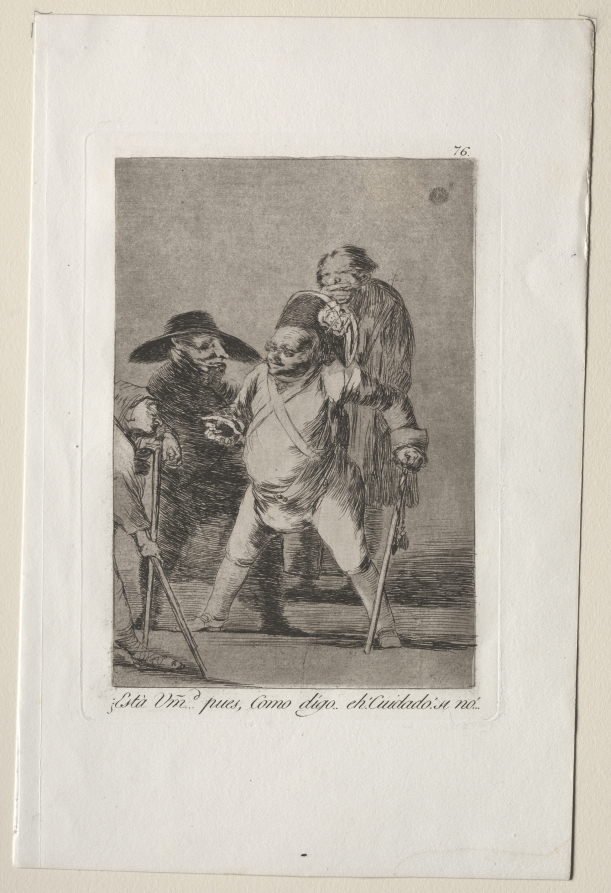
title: You understand?...Well, as I say...eh! Look out! Otherwise..., Plate 76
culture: Spain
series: Los Caprichos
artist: Francisco de Goya (Spanish, 1746–1828)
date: 1799, printed c. 1855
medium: etching and aquatint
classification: Print